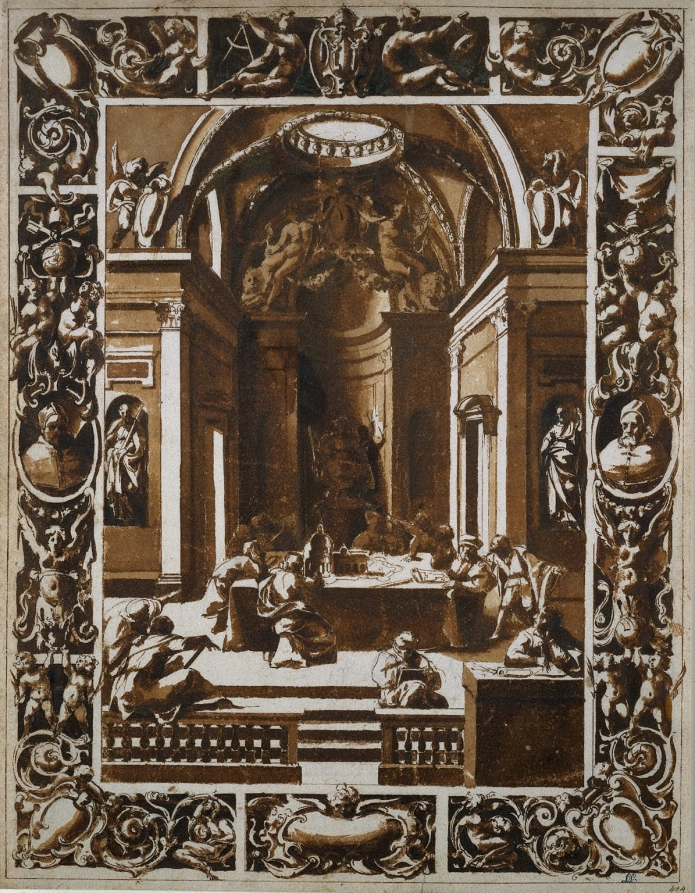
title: Architectural Conference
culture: Italy, 17th century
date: c. 1622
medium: pen and brown ink and brush and brown wash with graphite; framing lines in brown ink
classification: Drawing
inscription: lower right, in brown ink: 404 ; VERSO, center right, in graphite: 2 ; lower center, in graphite: Leonello Spada